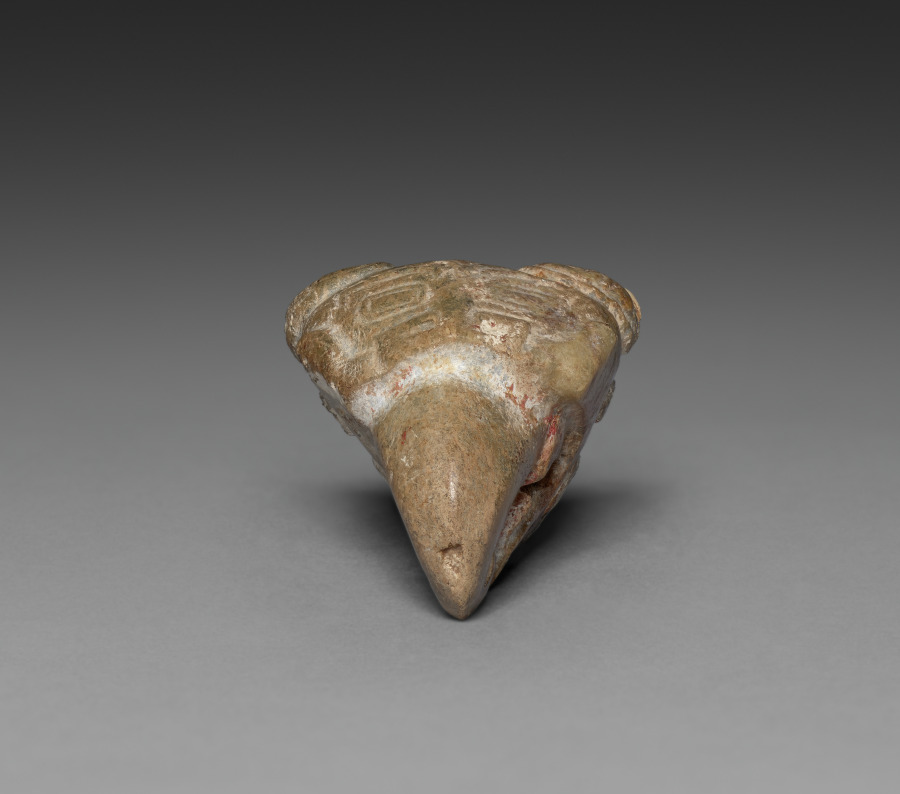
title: Feline Head with Bovine Horns and Elephant Trunk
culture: China, Shang dynasty (c. 1600–c. 1046 BCE)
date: 1300–1000 BCE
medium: jade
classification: Jade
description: This small jade was shaped into a fantastic, composite animal: a feline form with bovine horns and an elephant's trunk.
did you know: The mouth, the underside of the nose, and the tapering hole for attachment at the rear of the head were cut by drilling.